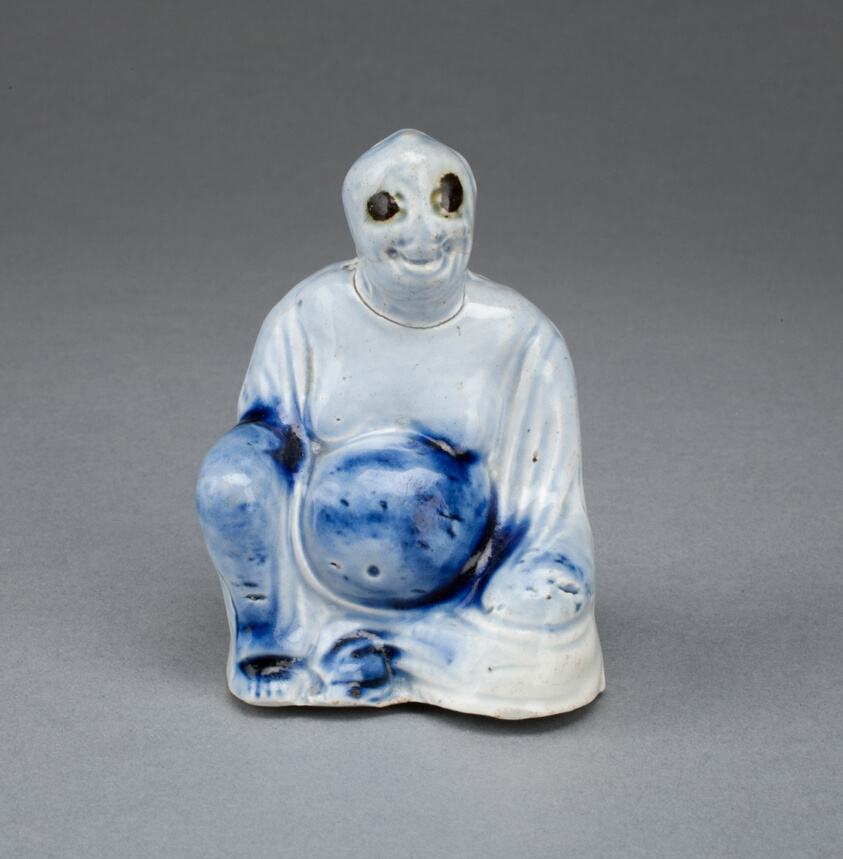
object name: Ceramics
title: Seated Buddha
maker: Staffordshire, England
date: 1750/65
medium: Salt-glazed stoneware, cobalt blue and brown enamel decoration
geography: Staffordshire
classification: salt-glazed stoneware; ceramics; stoneware; european decorative arts